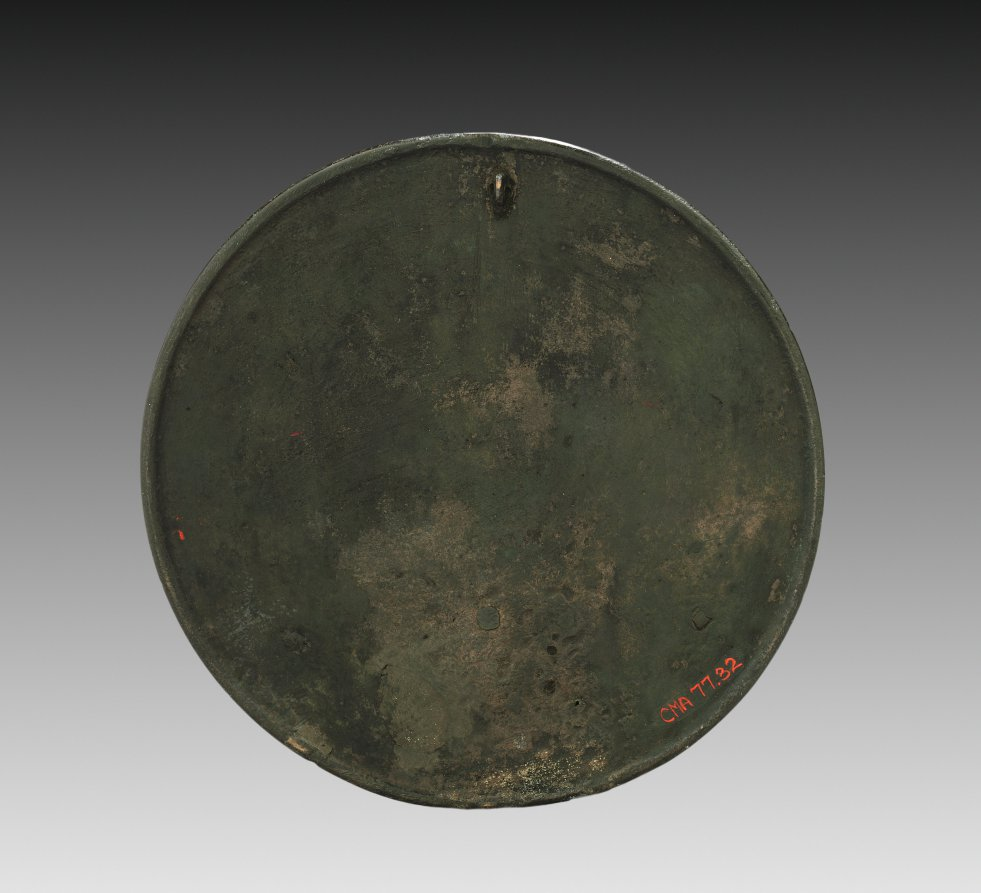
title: Bishamonten Ritual Mirror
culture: Japan, Heian period (794–1185)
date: 1000s–1100s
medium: silvered bronze with incised design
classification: Metalwork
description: Bishamonten, the Buddhist guardian of the North, appears here with an entourage. Early votive mirrors like this one are called kyōzō, literally “mirrors with images.” One theory is that they appeared along with the development of Shinto-Buddhist combinatory thought, in which specific Buddhist deities were identified with specific kami, or Shinto deities. In this theory, sacred mirrors venerated as proxies for kami came to be incised with images of Buddhist deities. Another idea is that they developed in the context of Esoteric Buddhist ritual.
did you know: Bishamonten sits on a demon who struggles beneath his weight.